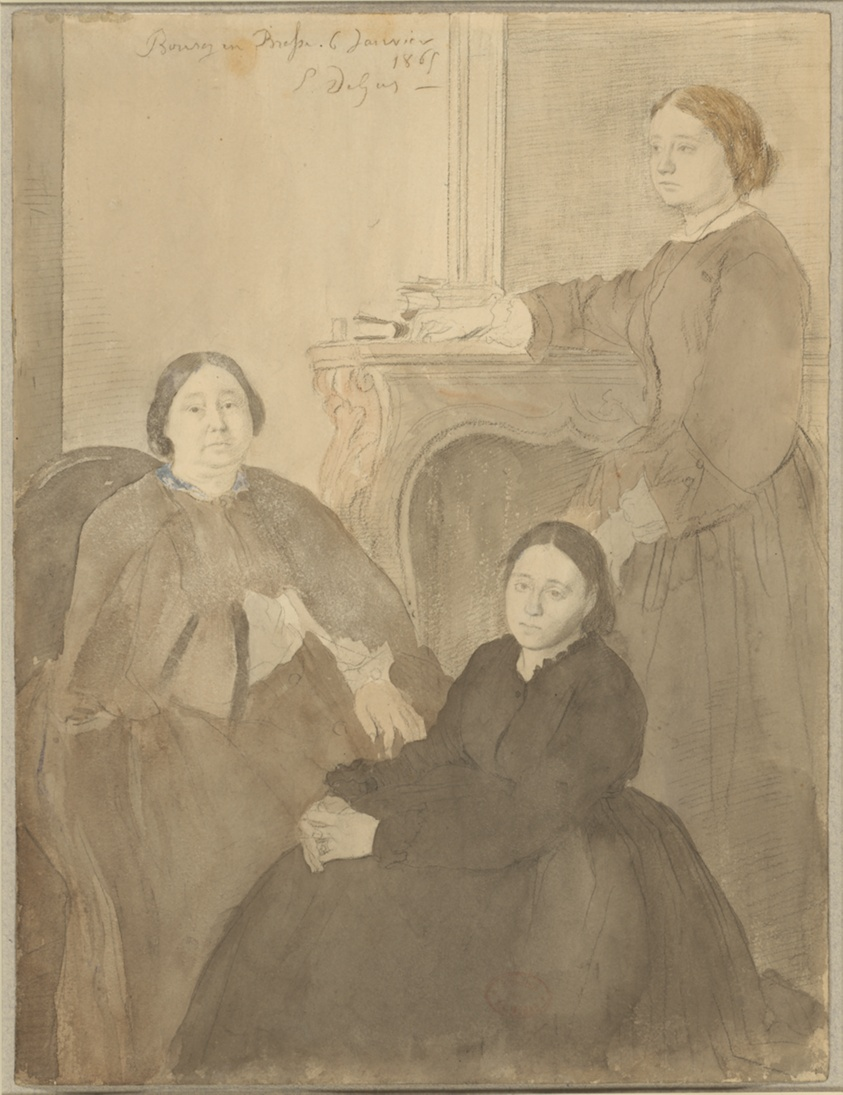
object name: Drawing and Watercolor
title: Mme. Michel Musson and Her Daughters, Estelle and Désirée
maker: Edgar Degas; French, 1834-1917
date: January 6, 1865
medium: Watercolor, with touches of charcoal, brush and red chalk wash, heightened with white gouache, over graphite on cream wove paper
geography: France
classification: watercolor; drawings (visual works); prints and drawing; paper